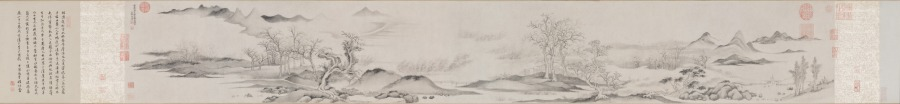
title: Water Village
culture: China, Ming dynasty (1368–1644)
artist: Wen Boren (Chinese, 1502–1575)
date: 1570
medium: handscroll; ink and light color on paper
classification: Painting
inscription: 隆慶庚午秋仿趙文敏筆. 五峰文伯仁 [印] 五峰山人; 文伯仁印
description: In the autumn of 1570, Wen Boren painted this seemingly unemotional scene of low-lying marshlands with a chain of rounded mountains in the background. A fishing boat is nestled on the shore near the village. Although paths and bridges traverse the landscape, only two people are visible in the stillness. From the restrained atmosphere of this landscape, one would never guess that Wen Boren was known as the “bad boy” of the Wu School for his explosive temper. As a younger man, he was even embroiled in a contentious lawsuit with his own uncle, Wen Zhengming (1470–1559), a master of Ming dynasty painting with whom he had trained. The ideal of the scholar-painter, or literati, was that an artist’s moral character is reflected in his paintings, so there was great incongruity between Wen Boren’s difficult personality and his restrained landscapes. A contemporary, Wang Shizhen, wrote this about him: "This gentleman is prone to behave odiously and screamed accusations at people. How is it possible for him to carry in his bosom such a wealth of scenic wonders?" Who knows what effort it took to subdue his fractious spirit to project an image of coolness and refined taste in his paintings?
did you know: A foreground tree has an eccentric twisting silhouette and pepper-dot "halo" of leaves.